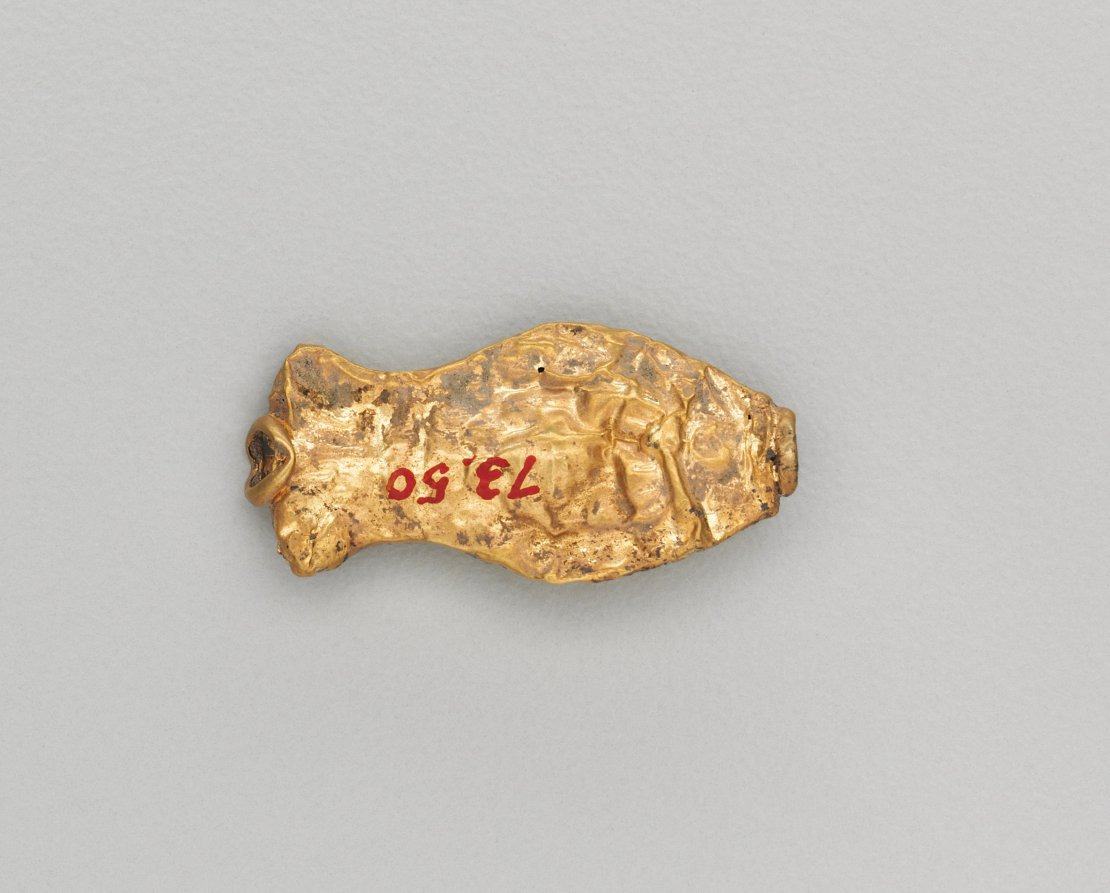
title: Necklace Bead in the Form of a Fish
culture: India, Shunga period (185–78 BCE)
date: 185–72 BCE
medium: gold repoussé with granulation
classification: Jewelry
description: Jewelry in ancient India often consisted of elements associated with water, such as fish and other aquatic plants and animals. Since water is essential for life, imagery that connotes water is life-affirming, or auspicious, and therefore appropriate adornment.